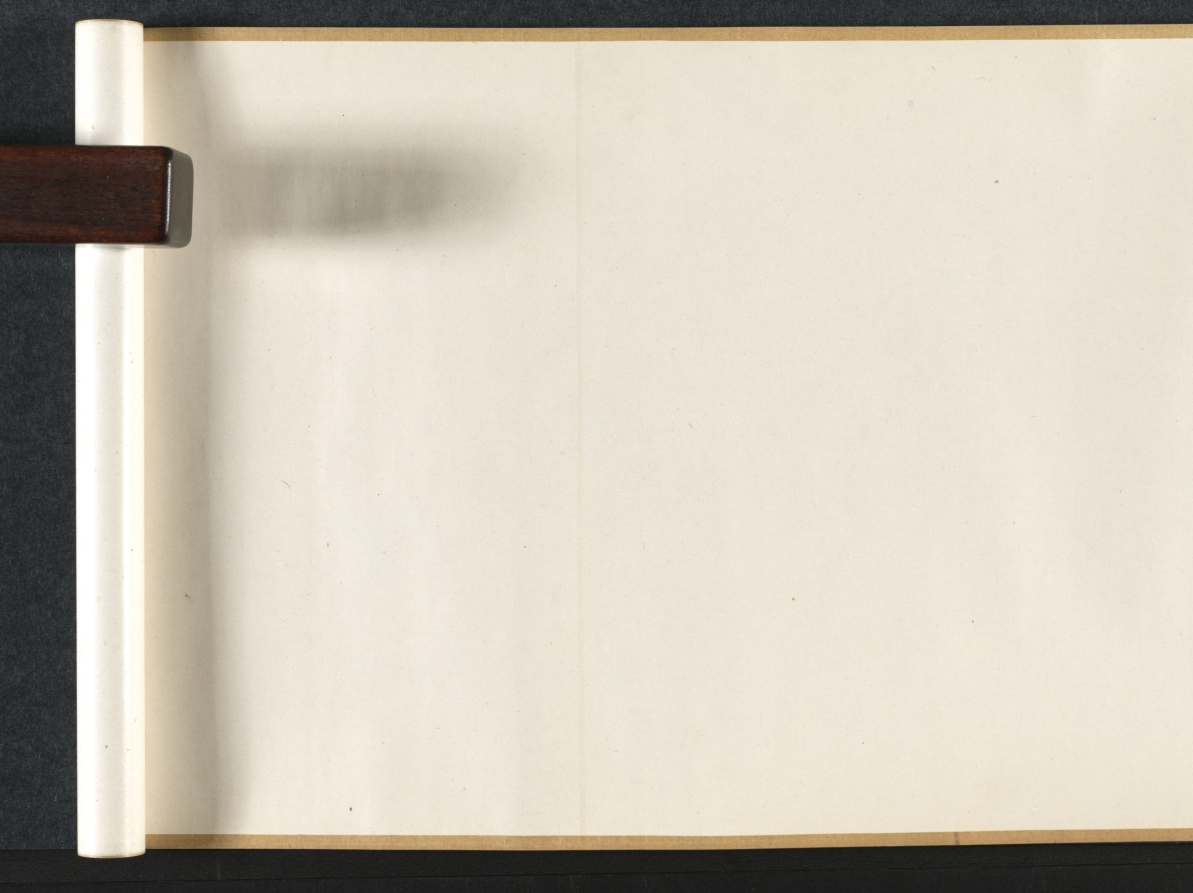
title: The Lantern Night Excursion of Zhong Kui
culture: China, Yuan dynasty (1271-1368)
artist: Yan Hui (Chinese, active 1270–1310)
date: late 1200s–early 1300s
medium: handscroll; ink and slight color on silk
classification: Painting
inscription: Artist's signature [and probable seal]: Yan Qiuyue 顏秋月 Title on frontispiece and 1 seal of Niu Shuyu 鈕樹玉 (1760–1827): Qiuyue mohuan 秋月墨幻 [Qiuyue's Ink Fantasy]. 31 additional seals: 2 of Yang Shiqi 楊士奇 (1365–1444); 2 of An Guo 安國 (1481–1534); 8 of Xiang Yuanbian 項元汴 (1525–1590); 2 of Geng Zhaozhong 耿昭忠 (1640–1686); 4 of Pu Tung 溥侗 (1870–1952); 7 of Tan Jing 譚敬 (1911–1991); 1 of Liu Ting-chih (20th c.); 5 unidentified.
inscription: An inscription by Zizhi Shanren 紫芝山人 [probably Jiang Hui 蔣惠], dated 1389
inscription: An inscription by Wu Kuan 吳寬 (1436–1504)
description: Here, the demon queller Zhong Kui leads a nightly procession of street entertainers with bare, muscular bodies and demonic faces. Some wear shabby clothes, and all perform stunts and tricks to astound and scare the viewer. In fact, a New Year custom in cities of southeast China had the poor, disguised as demons, process through the streets and play their tricks to clear households of evil spirits and welcome the spring. From right to left, a demonic figure leads the procession and beats a drum; another lifts a large rock; one stands on his hands trying to drink; one balances a jar on his elbow; three hold and wield weapons; one carries a folded chair covered by a cow’s skin; another holds Zhong Kui’s qin (zither), books, brush, and inkstone. At the end of the scroll, two figures offer a cup and bottle of wine to Zhong Kui, who lifts his hand in command.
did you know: Zhong Kui was an ancient ghostbuster.